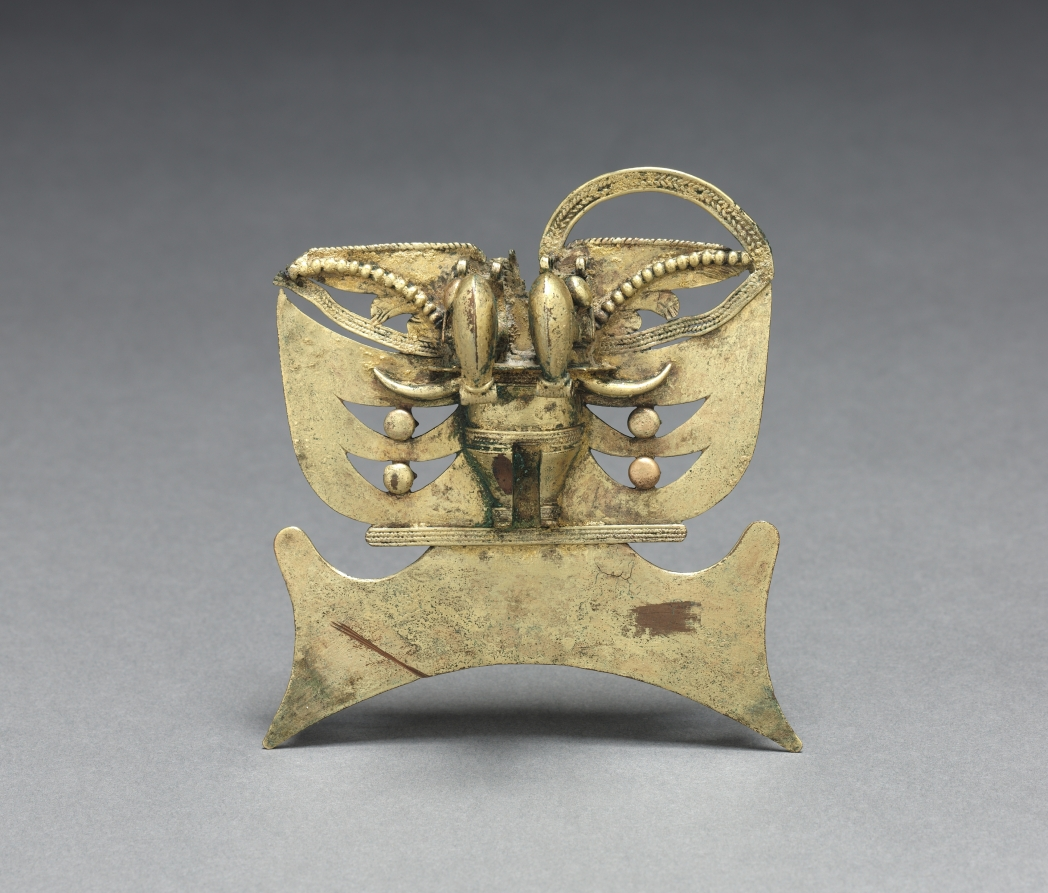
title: Human Effigy Pendant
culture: after the Tairona style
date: before 1947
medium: copper, gold, mercury, traces of iron and silver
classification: Metalwork